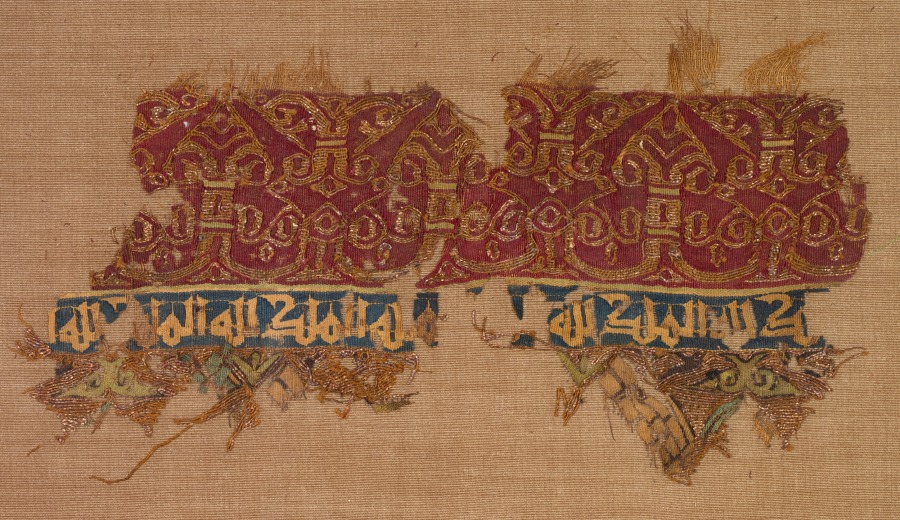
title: Tiraz with gold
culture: Egypt, Fatimid period, reign of Caliph al-Hakim, 1013–1020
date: 1013–1020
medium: plain weave with inwoven tapestry weave: linen, silk, and gold filé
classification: Textile